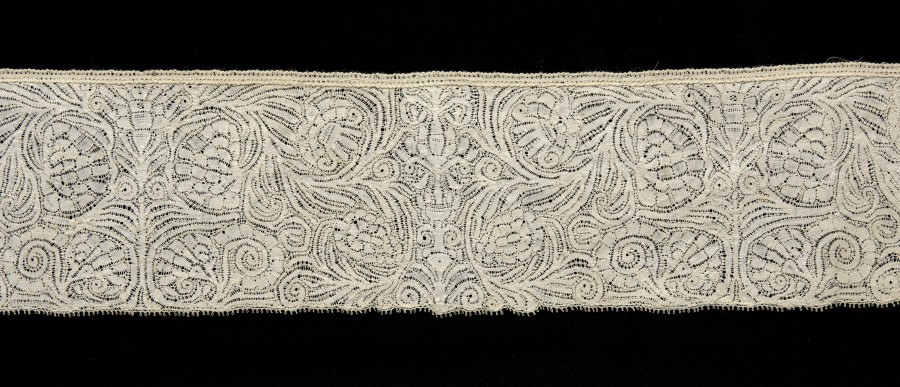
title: Lace Edging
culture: Italy, Abruzzi, Pescocostanzo, l'Aquila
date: 1600s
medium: Linen: bobbin lace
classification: Lace